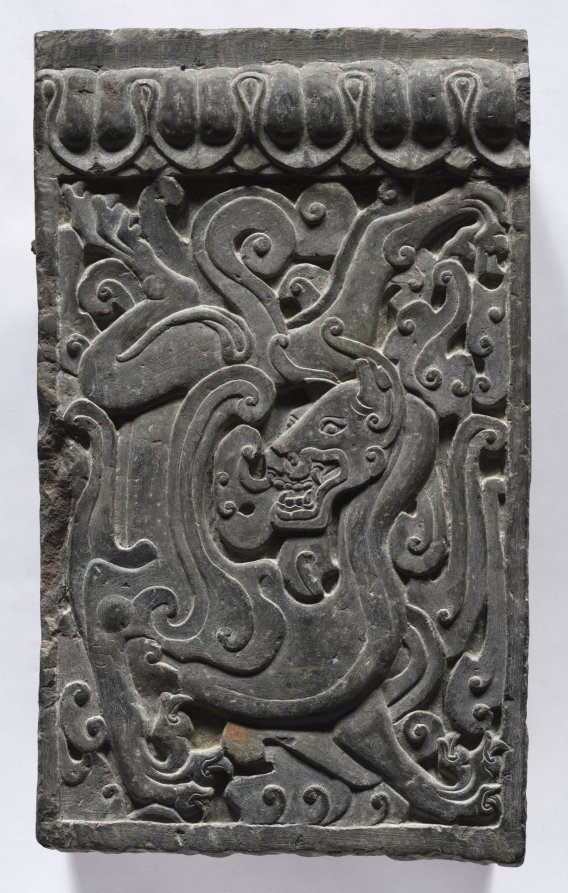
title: Section of a Coffin Platform: Feline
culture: China, Northern Qi dynasty (550-577)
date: 550–577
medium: limestone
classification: Sculpture